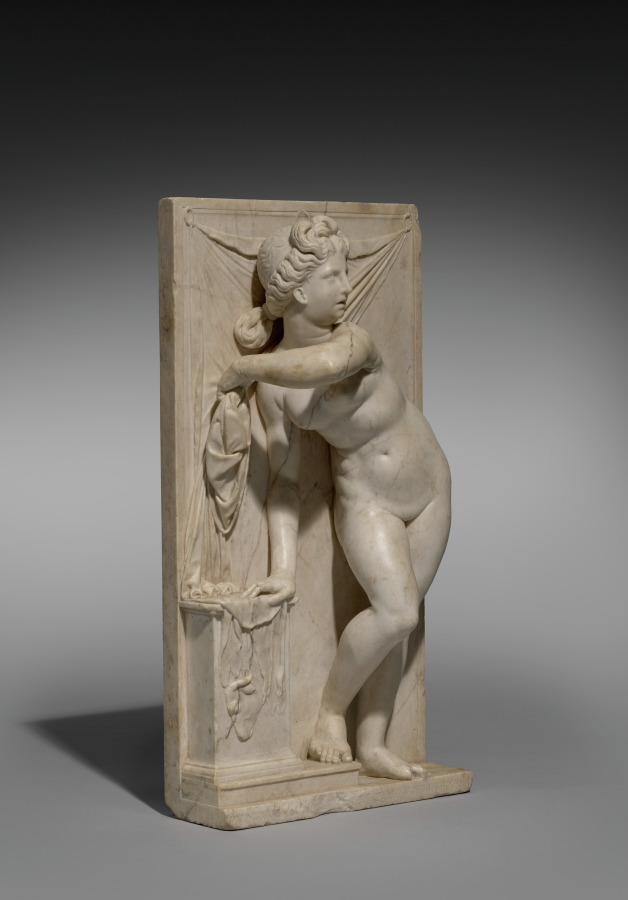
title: Dido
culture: Italy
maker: Aurelio Lombardo (Italian, 1501–1563)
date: c. 1525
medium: marble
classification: Sculpture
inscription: PVNICA SVM [DIDO ERE]XI QVAE MOENIA BYRSA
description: Artists customarily portrayed Dido as a forlorn lover abandoned by the Trojan hero, Aeneas, but here she is a conquering queen. Dido draws aside an oxhide curtain, a reference to the mythical founding of Carthage (in modern-day Tunisia, North Africa), when she was given an oxhide to demarcate granted land. By cutting it into thin strips she was able to encircle the future city. Dido was likely created for display in a studiolo, a place of study featuring refined works of art appreciated by humanist scholars and aficionados during the Renaissance.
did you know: Dido’s nudity and hairstyle are allusions to ancient Greek images of Aphrodite.